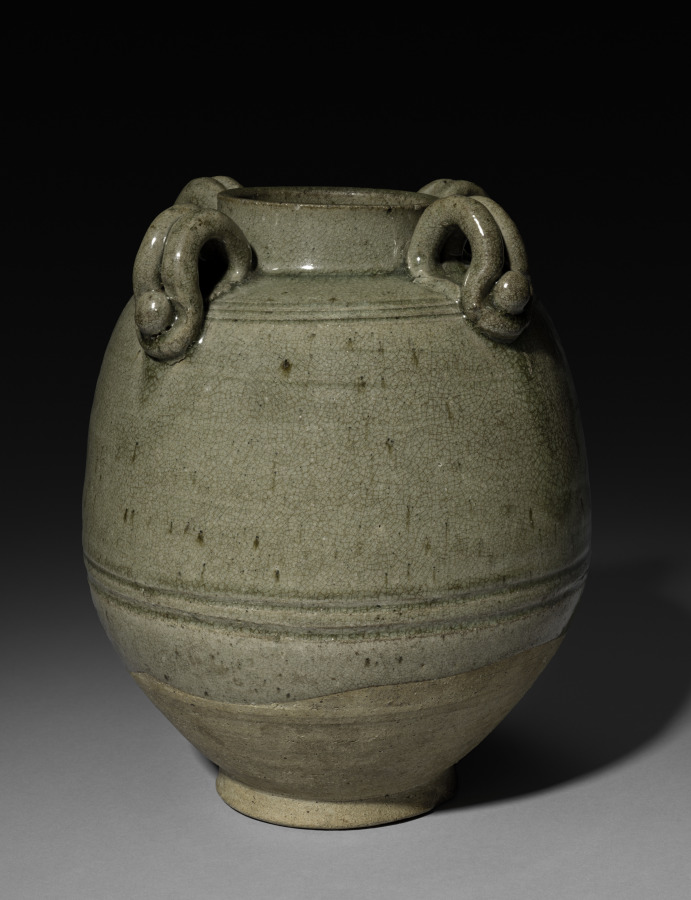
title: Jar with Four Loop-Handles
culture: China, Sui dynasty (581-618) - Tang dynasty (618-907)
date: 500s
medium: glazed gray stoneware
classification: Ceramic